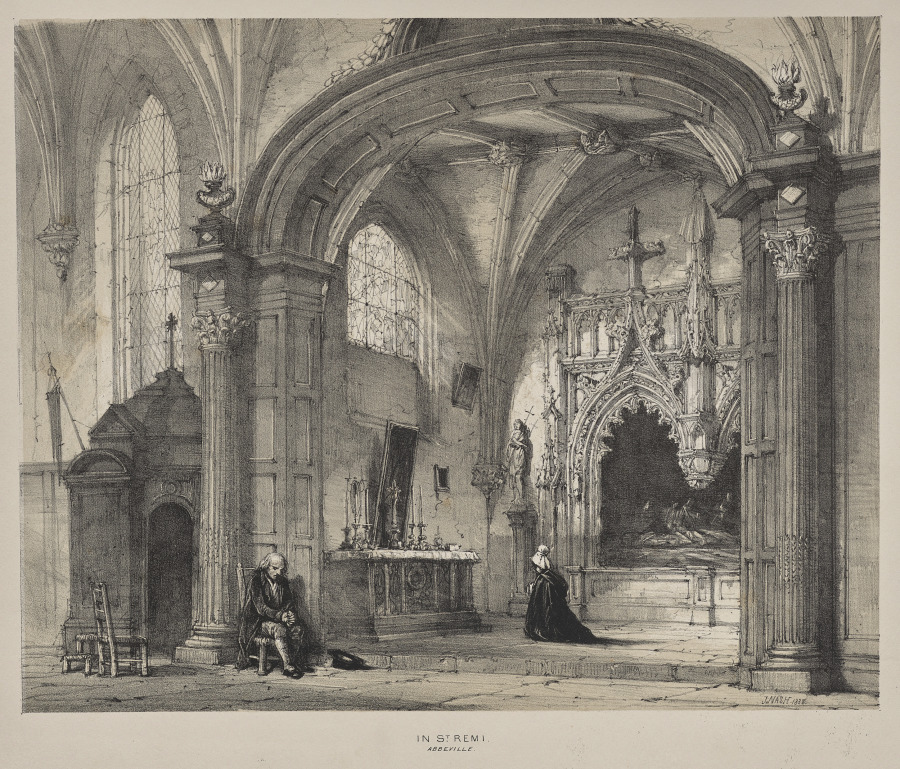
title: Architecture of the Middle Ages: In St. Remi, Abbeville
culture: England, 19th century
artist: Joseph Nash (British, 1808–1878)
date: 1838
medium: lithograph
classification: Print